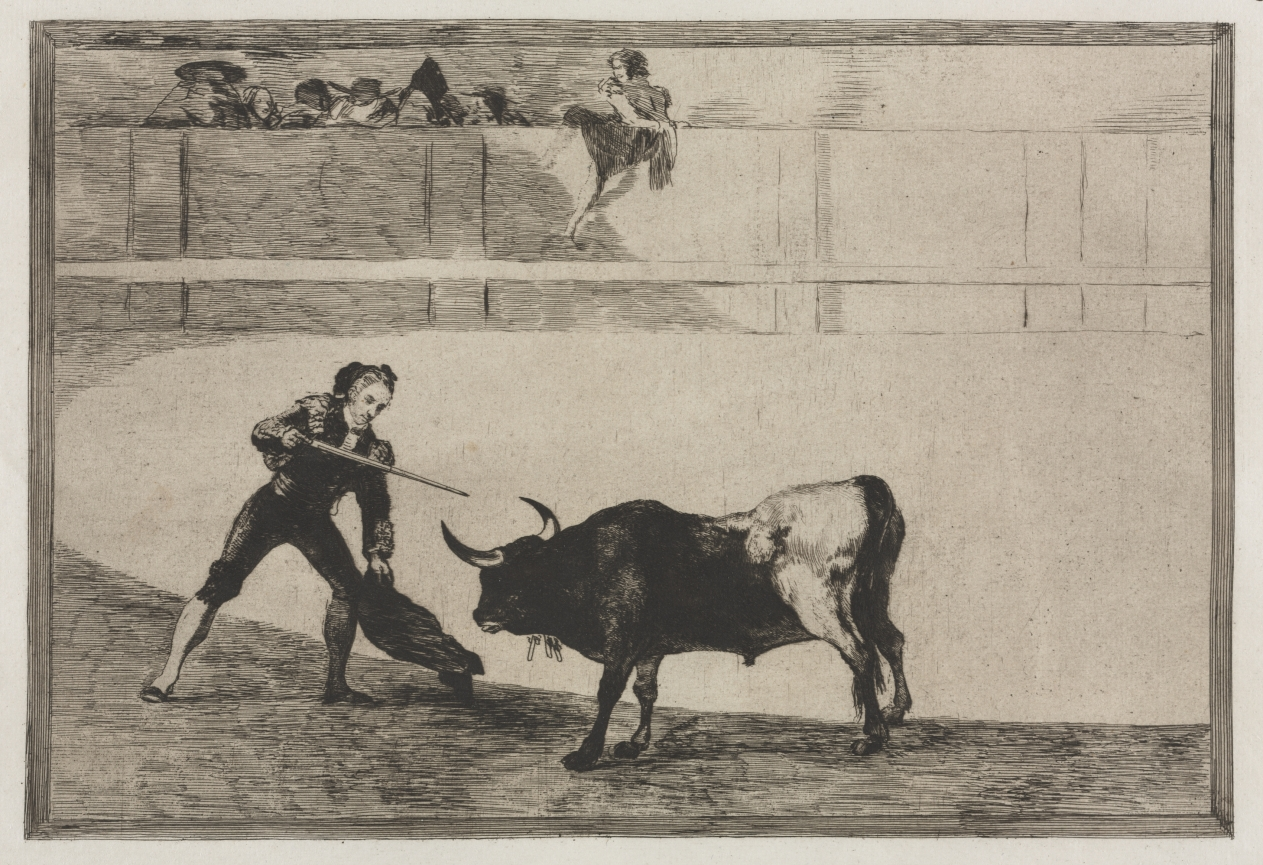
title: Bullfights: Pedro Romeo Killing the Halted Bull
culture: Spain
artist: Francisco de Goya (Spanish, 1746–1828)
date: 1816, printed 1876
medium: engraving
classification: Print